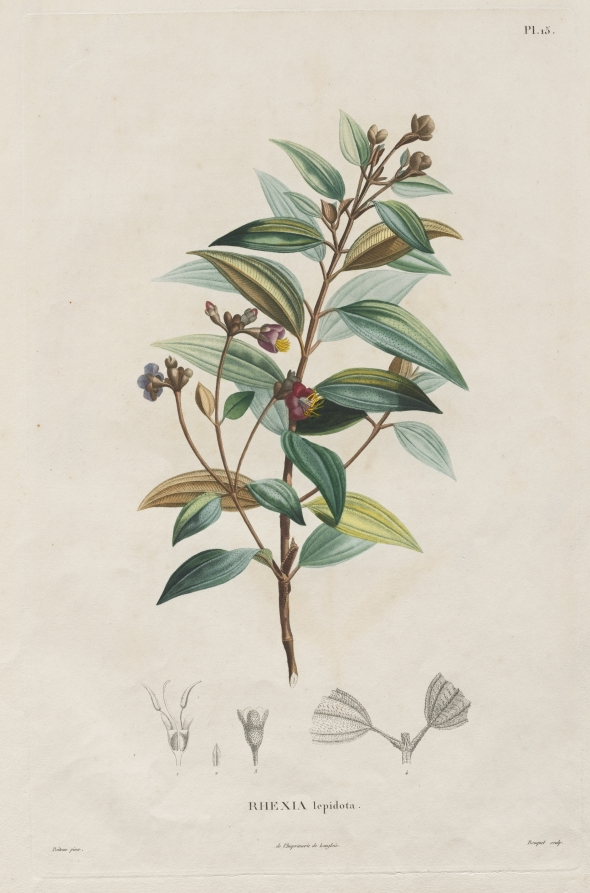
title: Voyage aux Régions équinoxiales du nouveau continent, fait dans les années 1709 à 1804: Monographie des melastomacées: No. 15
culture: Germany, 19th century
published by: Alexander, Freiherr von Humboldt (German, 1769–1859)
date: 1816–1823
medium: stipple engraving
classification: Print